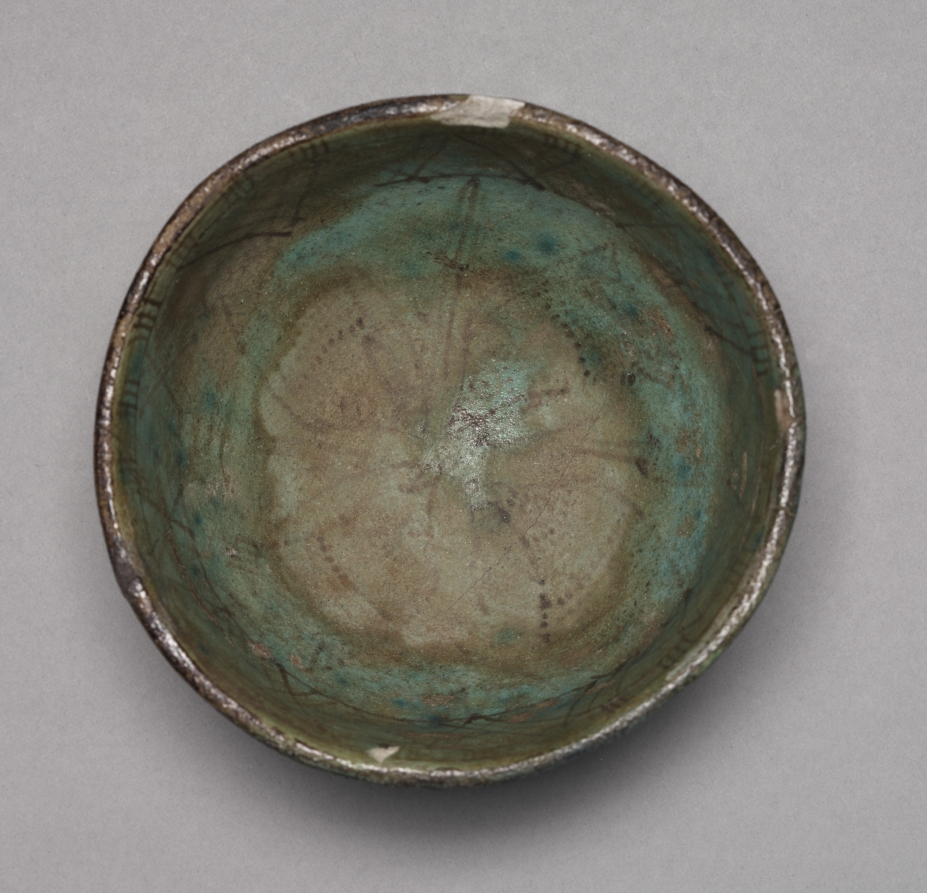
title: Decorated Bowl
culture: Egypt, Middle Kingdom (2040–1648 BCE)–New Kingdom (1540–1069 BCE)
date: 1980–1801 BCE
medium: turquoise faience with black painted decoration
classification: Vessels